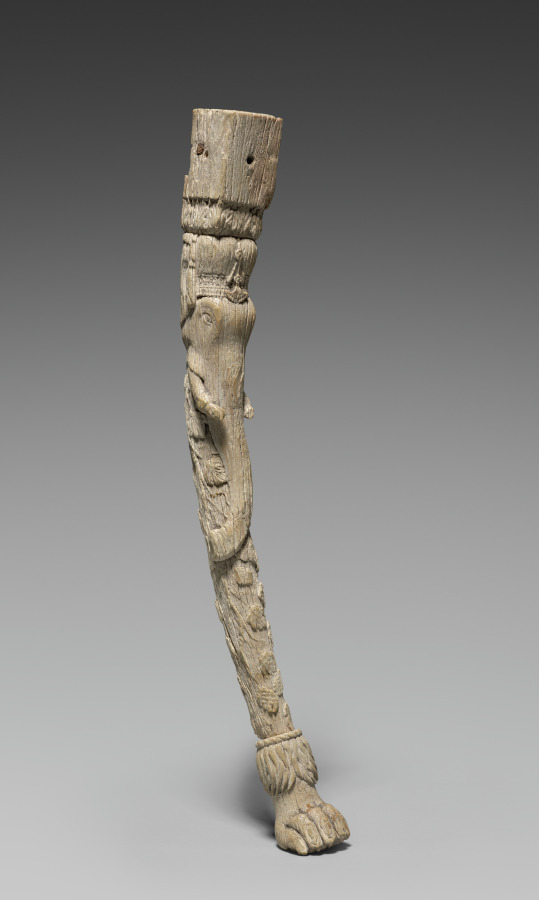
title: Chair Leg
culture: Afghanistan, Begram, Kushan period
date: 300s CE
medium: ivory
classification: Ivory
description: This ivory carving was made to sheath wooden furniture made in India for trade along the Silk Road, which stretched from Rome to China. Indian ivory-faced furnishings--along with lacquer boxes from China and painted glass from Rome--were found in an extraordinary deposit of luxury goods at a site called Begram. The wood on which the ivory and lacquer were affixed has long disintegrated, and only the small pieces remain.